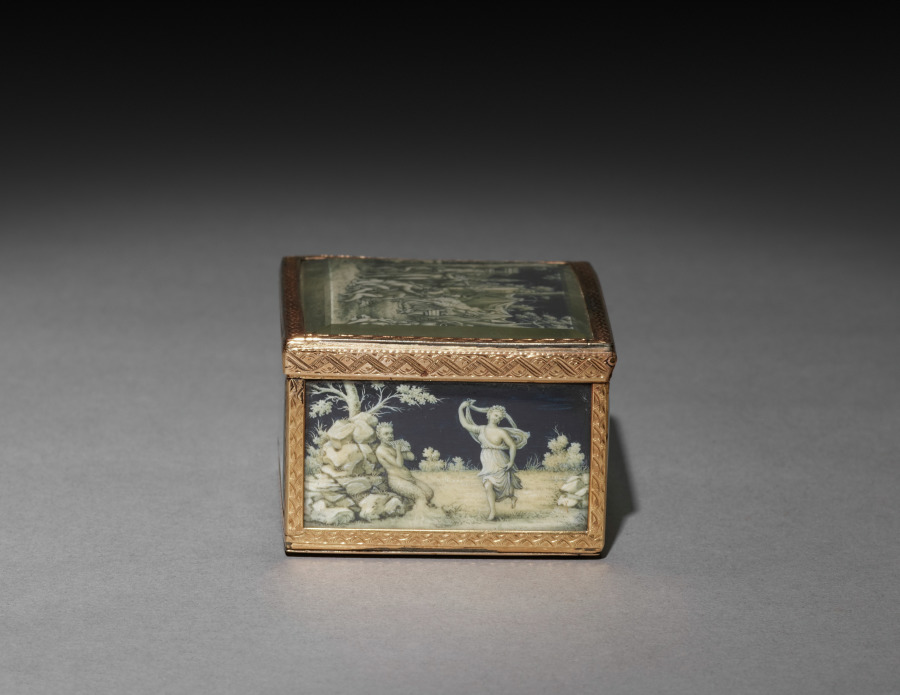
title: Box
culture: France, 19th century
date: 1800s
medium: painted miniatures under glass mounted in gold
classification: Miscellaneous